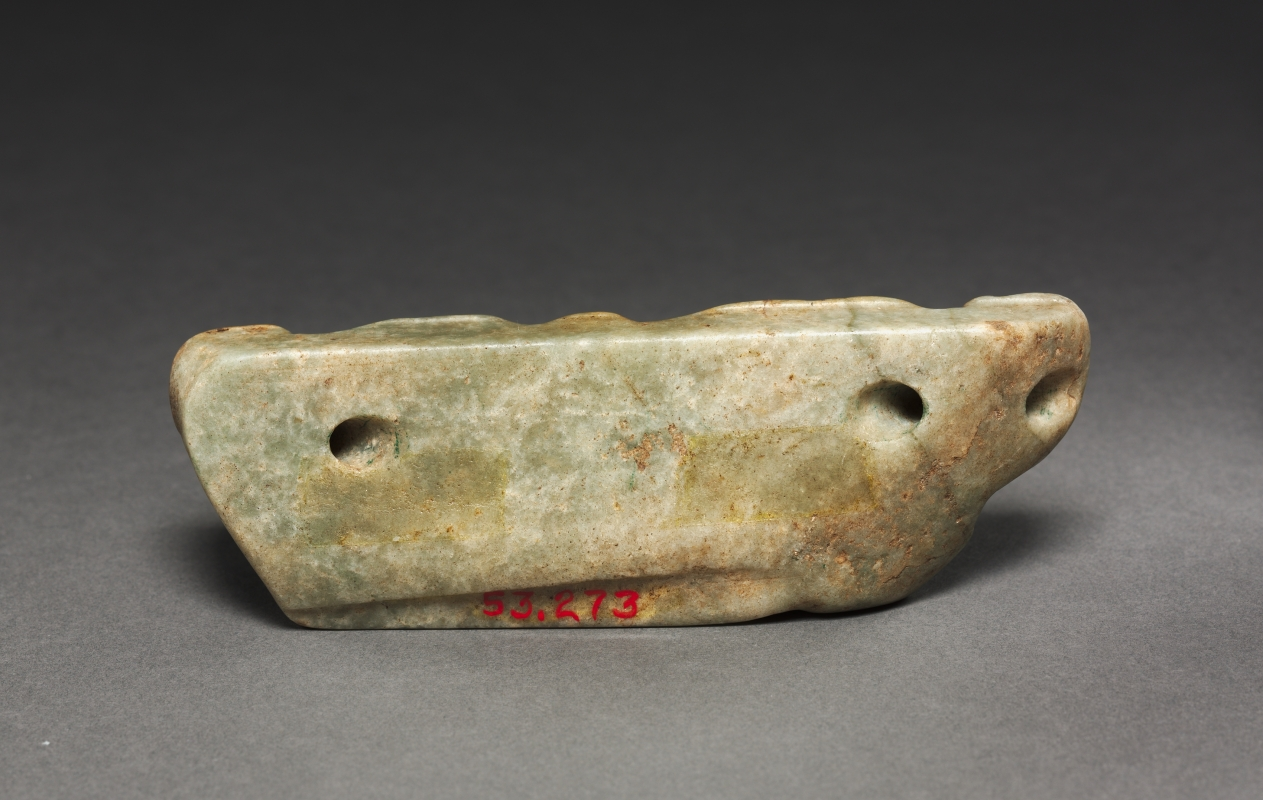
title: Jaguar Pendant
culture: Maya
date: 250–900 CE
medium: jade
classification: Jade